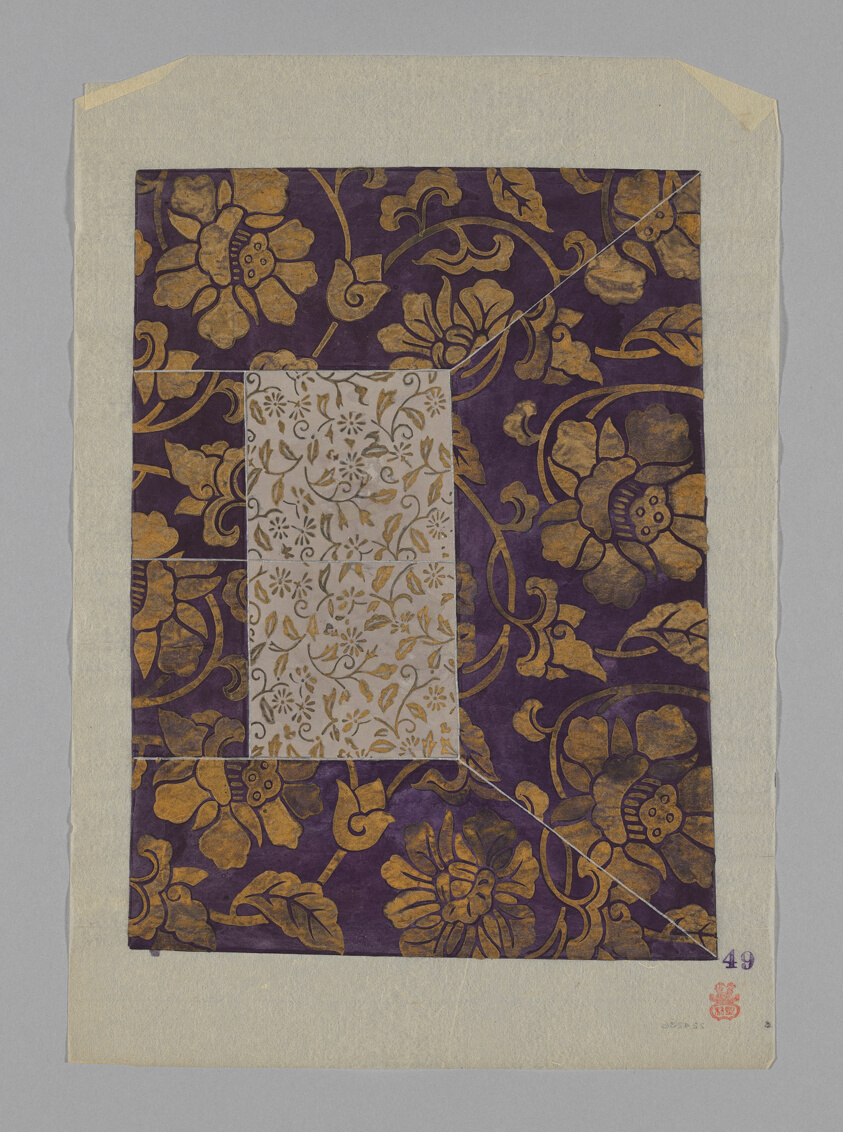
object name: Drawing and Watercolor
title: Design on Paper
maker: Japan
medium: Paper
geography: Japan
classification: textile; accessory - paper design; watercolor; paper